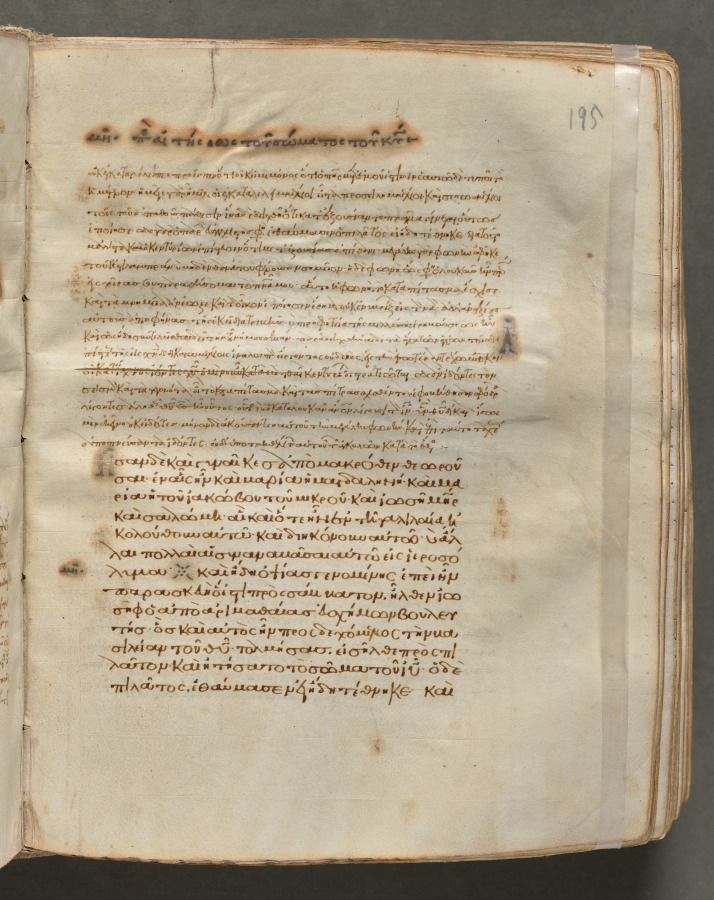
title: Text, folio 195 (recto), from a Gospel Book with Commentaries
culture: Byzantium, Constantinople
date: c. 1000–1100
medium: ink, tempera, and gold on vellum; leather binding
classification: Bound Volume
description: Each of the four gospels in this book opens on a page with brilliantly illuminated borders depicting the author of the text as well as birds-principally peacocks, symbols of the immortality of the soul-and fountains, representing the fountain of life and the salvation of the soul. This volume consists of 428 leaves with texts in Greek. Its level of sophistication suggests that it was probably written and decorated in a monastery in Constantinople.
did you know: Gospel Books were carried in procession through Byzantine churches.